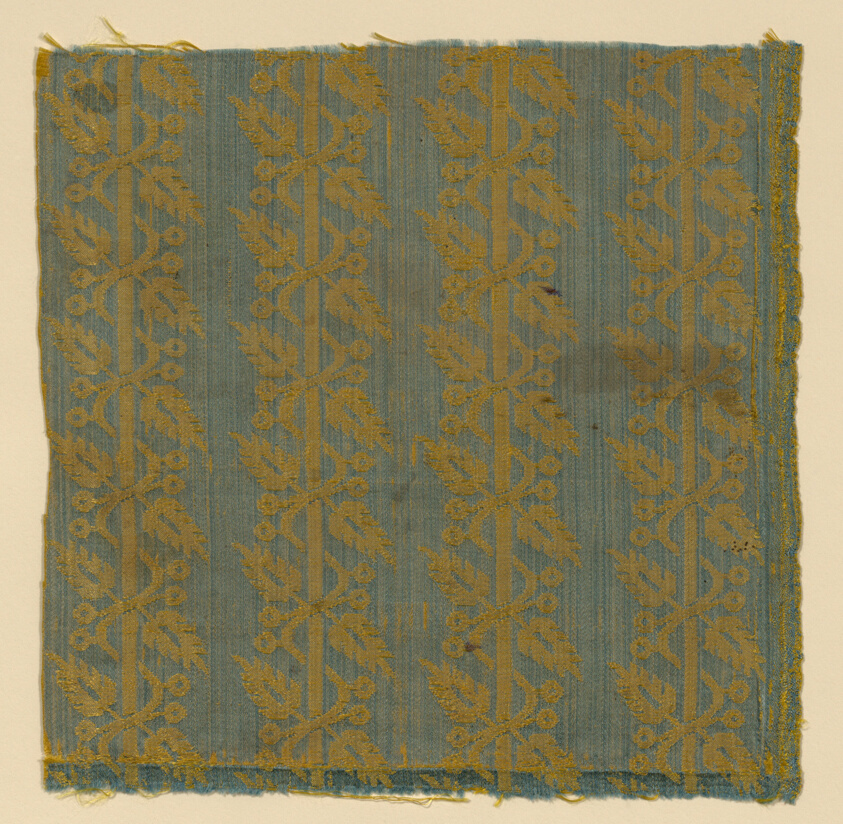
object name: Textile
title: Fragment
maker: Italy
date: 17th century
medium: Silk, satin weave self-patterned by reversing of faces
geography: Italy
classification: textile; weaving